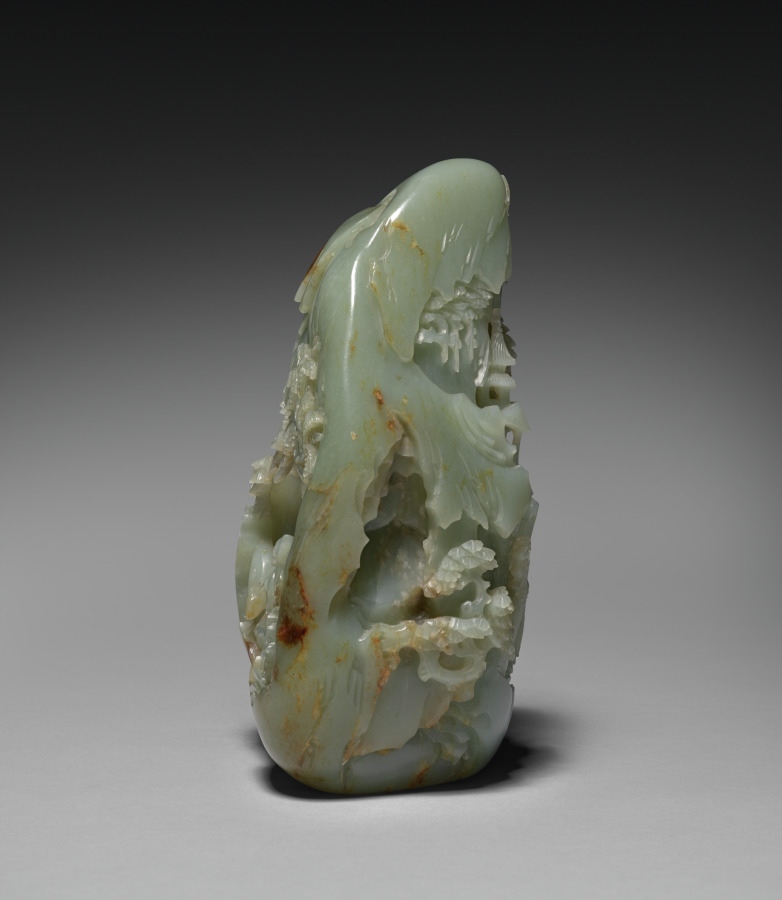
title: Miniature Mountain with Daoist Paradise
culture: China, Qing dynasty (1644–1911), Qianlong reign (1736–95)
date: 1736–95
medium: green jade with brown markings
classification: Jade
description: Sizable jade boulders of mountainous landscapes were carved to represent the search for the paradise or immortals' dwellings in the mountains. This Daoist theme has fired the Chinese imagination throughout history. Believed to have spiritual and magical properties, jade has long been used in tombs and intended for preserving the corporeal body and the soul in the quest for eternity. It is recorded that Daoist practitioners drank morning dews with scraps of jade as an elixir of immortality.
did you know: The bearded immortal is accompanied by a servant carrying a cluster of peaches, symbols of immortality.